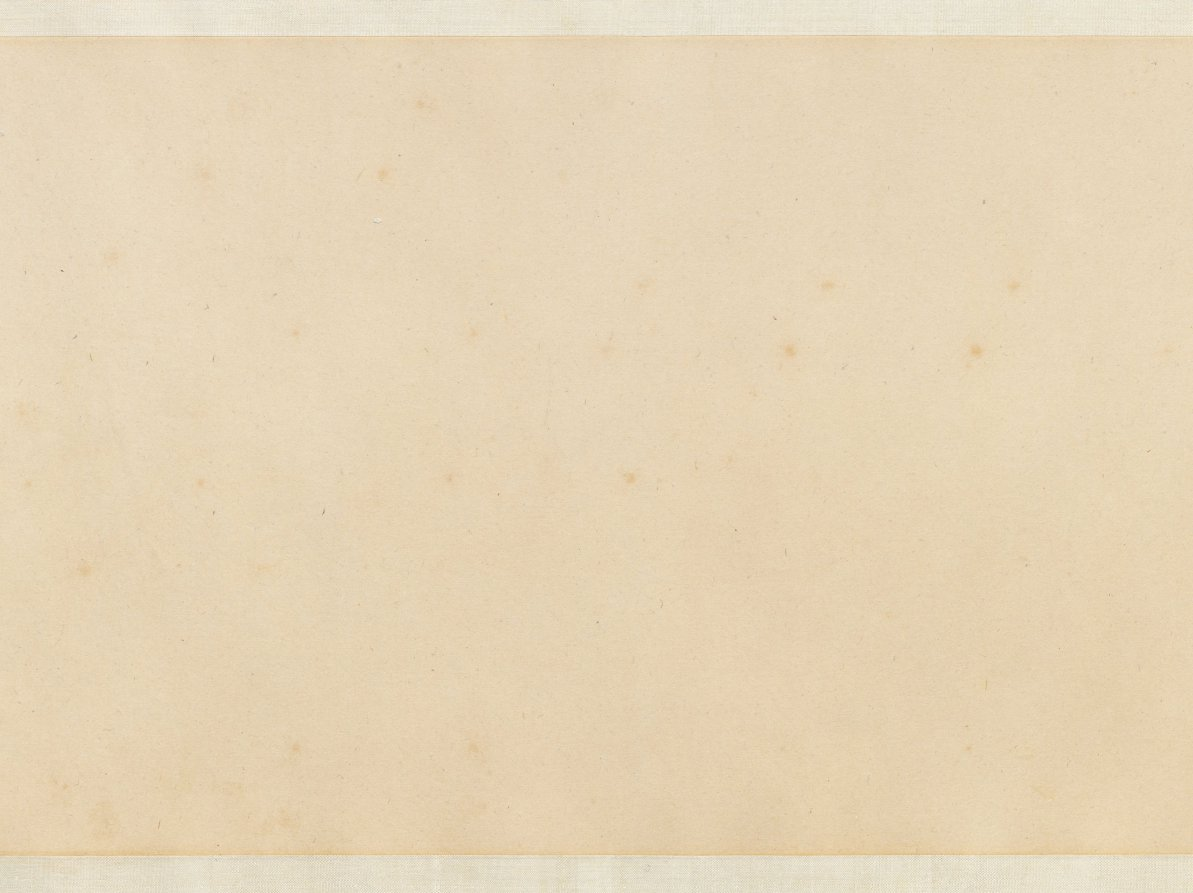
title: Sericulture (The Process of Making Silk)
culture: China, Southern Song dynasty (1127-1279)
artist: attributed to Liang Kai (Chinese, mid-1100s–early 1200s)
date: early 1200s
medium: Handscroll; ink and color on silk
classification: Painting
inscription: 3 colophons and 7 seals of Ch'eng Ch'i (20th c.).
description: By the Southern Song period, the economic center of the silk industry had shifted to the lower Yangzi delta, while the north continued to be troubled by wars. Divided into three sections, the handscroll illustrates 14 steps in the process of making silk, from the raising of silkworms to the weaving of silk cloth. The scroll’s scenes follow the illustrations of Lou Shou’s (1090–1162) Pictures of Tilling and Weaving (gengzhi tu), the first recorded painting of this genre, which was conceived in Hangzhou around 1145. However, in the Cleveland painting the artist groups several scenes of sericulture together under the roof of an open structure.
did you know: The painting is attributed to Liang Kai, a court artist active from about 1201 to 1204 at the Imperial Painting Academy in the city of Hangzhou, a major silk weaving center from that time to the present day.